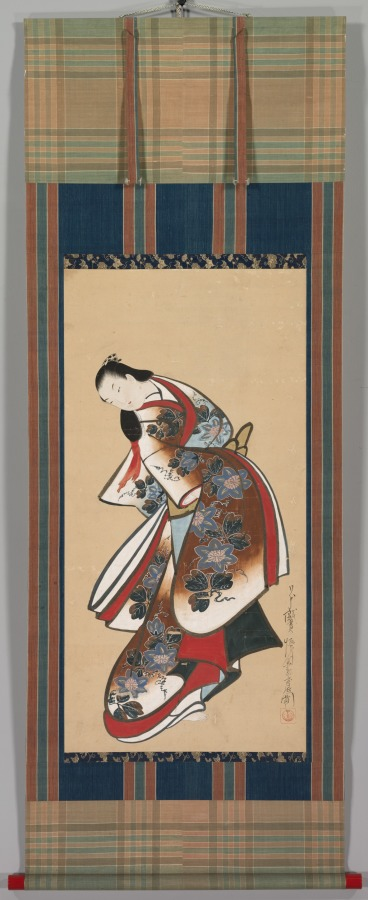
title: Courtesan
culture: Japan, Edo period (1615–1868)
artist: Kaigetsudō Doshin (Japanese, active 1711–1736)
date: early 1700s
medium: hanging scroll; ink and color on paper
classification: Painting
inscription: Signed: Japanese painting for amusement, this was painted by Doshin, the last leaf of Kaigetsu (Nihon giga Kaigetsu matsuyo Doshin kore [o] zu [su]) Sealed: Ando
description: Kaigetsudō Doshin was one of five painters in a studio operating under Kaigetsudō Ando (about 1671–1743) in the Asakusa area of Edo (now Tokyo). The workshop specialized in portraits, like this one, of high-ranking courtesans of the Yoshiwara district. Characteristic of those works, this painting features strong ink delineation of the subject’s twisting form and bold patterns in the kimono, as well as the absence of any sort of setting.